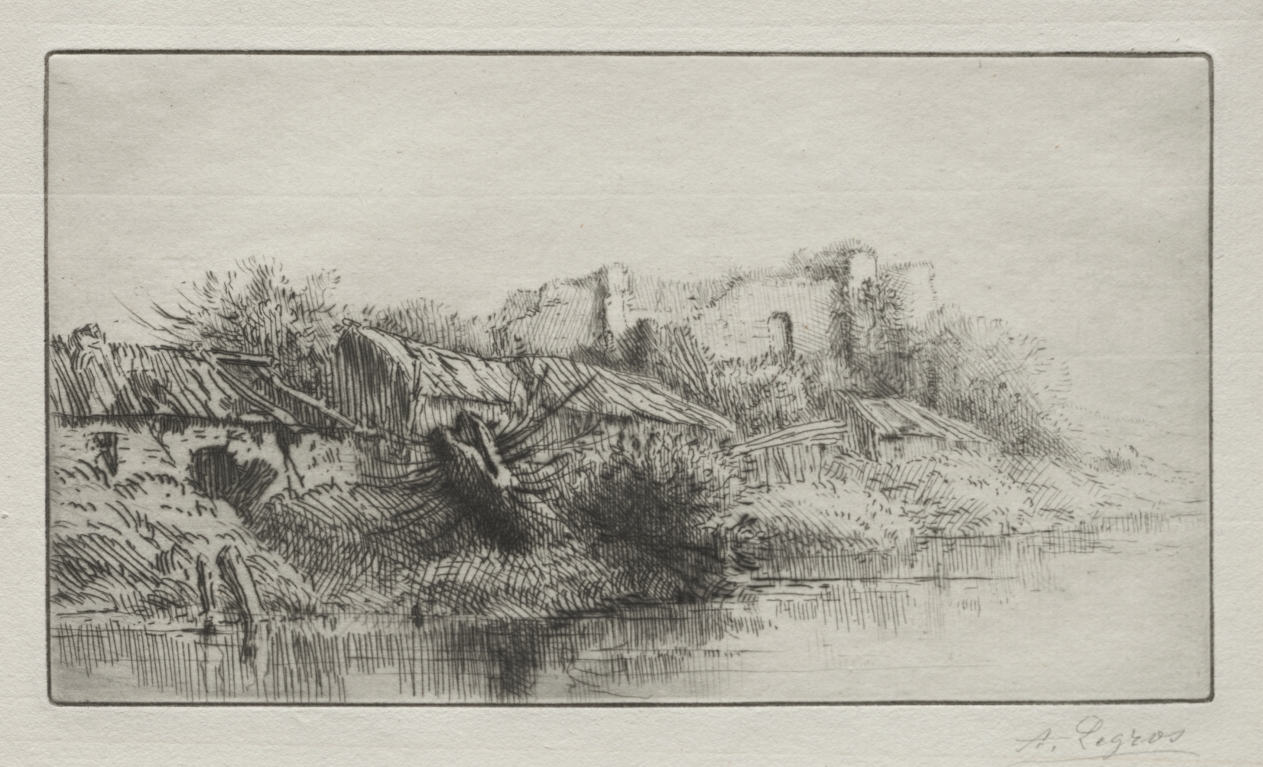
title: The Abandoned Village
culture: France, 19th century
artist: Alphonse Legros (French, 1837–1911)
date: c. 1857–1911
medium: etching and drypoint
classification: Print